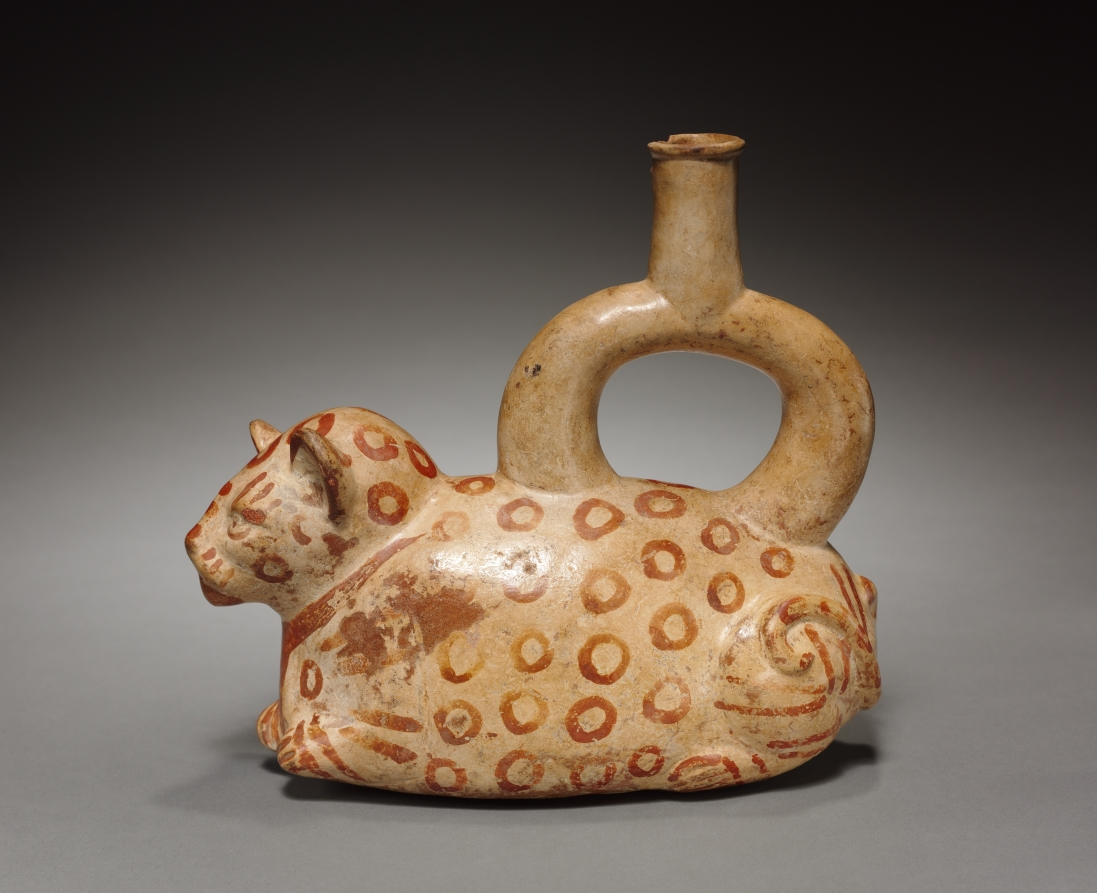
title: Stirrup Spouted Vessel of Feline Form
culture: Peru, Mochica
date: 1–1000 CE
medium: red earthenware decorated with cream-colored slip and brown pigment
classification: Ceramic